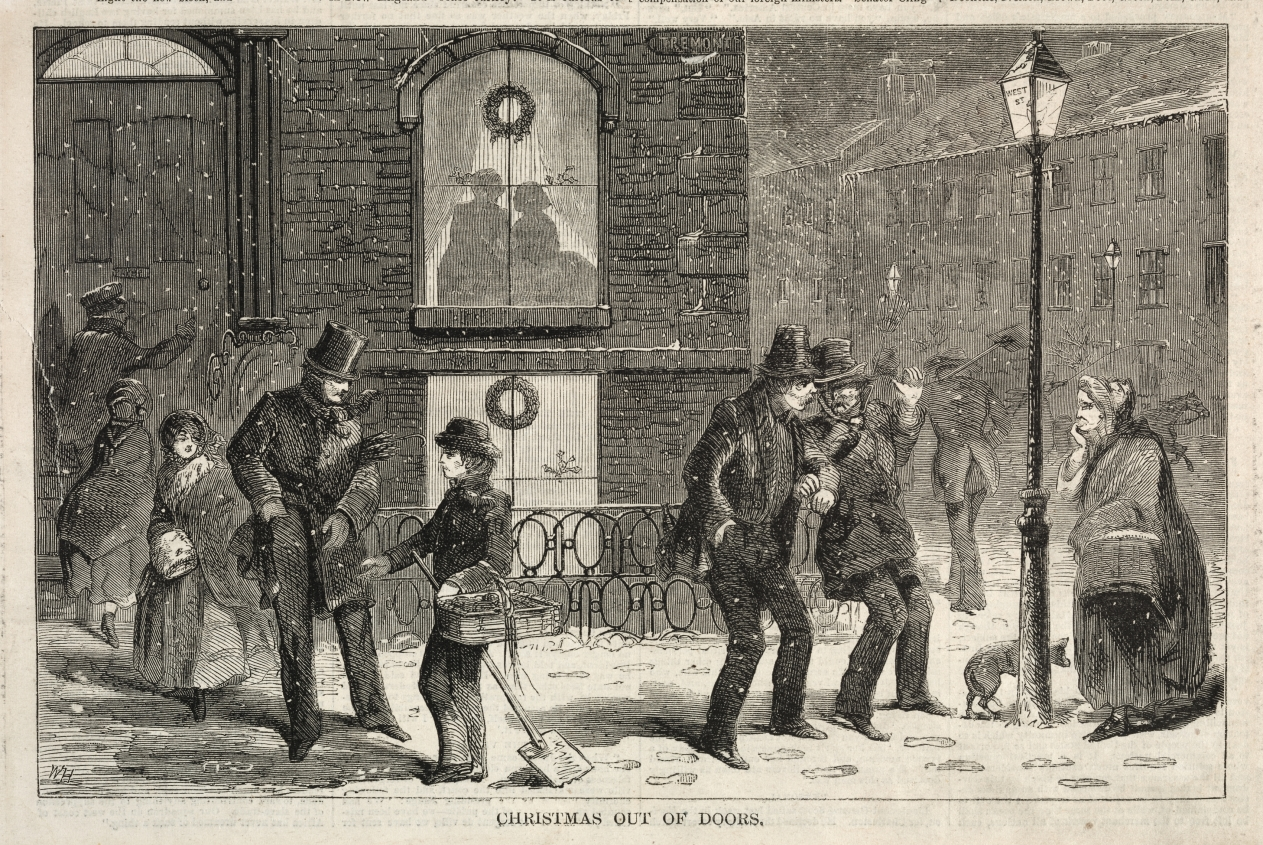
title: Christmas Out of Doors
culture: America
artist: Winslow Homer (American, 1836–1910)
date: 1858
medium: wood engraving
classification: Print